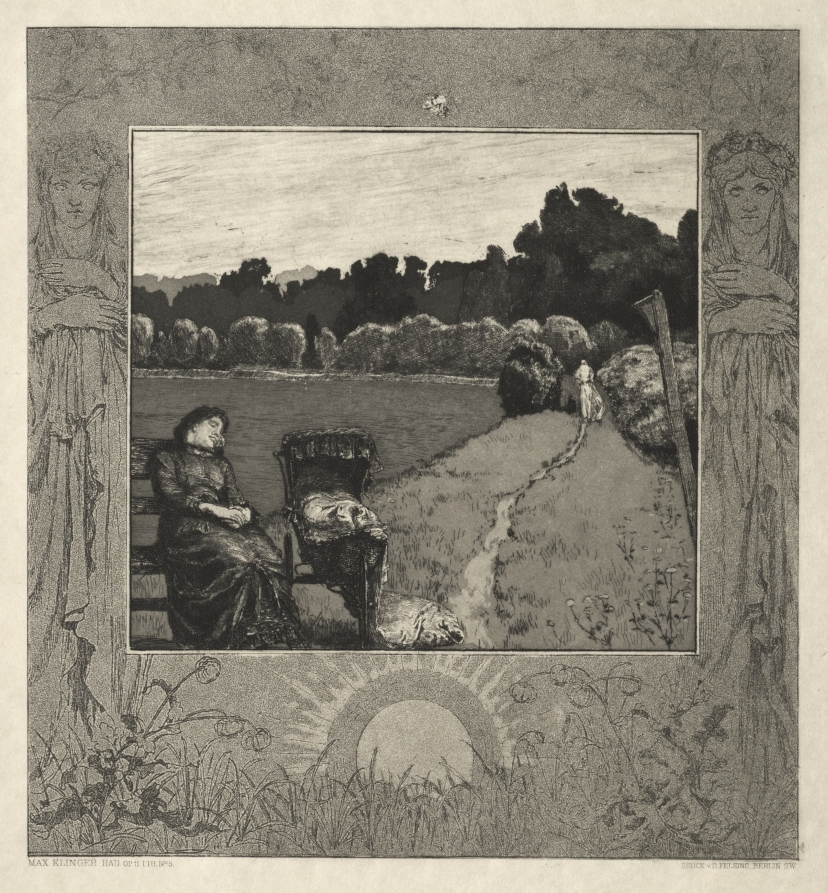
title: Child, from On Death, Part I, Opus XI (Kind, Vom Tode, Erster Teil, Opus XI)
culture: Germany, late 19th century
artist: Max Klinger (German, 1857–1920)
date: 1889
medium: etching and aquatint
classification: Print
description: In this, the fifth in Klinger’s series On Death, Part One, death occurs in a seemingly peaceful landscape. In a large meadow bordered by woods, a nanny has fallen asleep upon a bench. Beside her is a baby carriage, beneath which lies fallen bedding. On a path in the distance, toward the darkness of the forest, Death leads the child away, dead as a result of its fall.